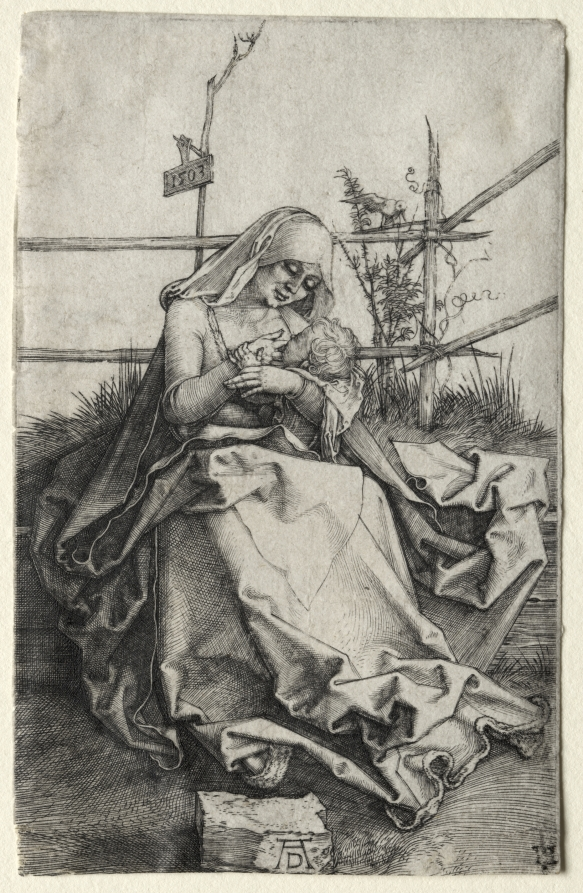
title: The Virgin and Child on a Grassy Bench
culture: Germany, early 16th Century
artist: Albrecht Dürer (German, 1471–1528)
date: 1503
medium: engraving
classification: Print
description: This simple and intimate scene of the Virgin nursing the Christ Child is among Dürer’s most tender depictions of the subject. With affectionate devotion the Virgin cradles the infant in a warm embrace, providing protection and essential nourishment. The gentle play of hands at the center of the composition adds to the naturalism of the scene and captures the universal bond between a mother and her child. The dead tree and the goldfinch resting on the trellis behind them allude to Jesus’s inevitable Passion, making this private moment all the more meaningful.